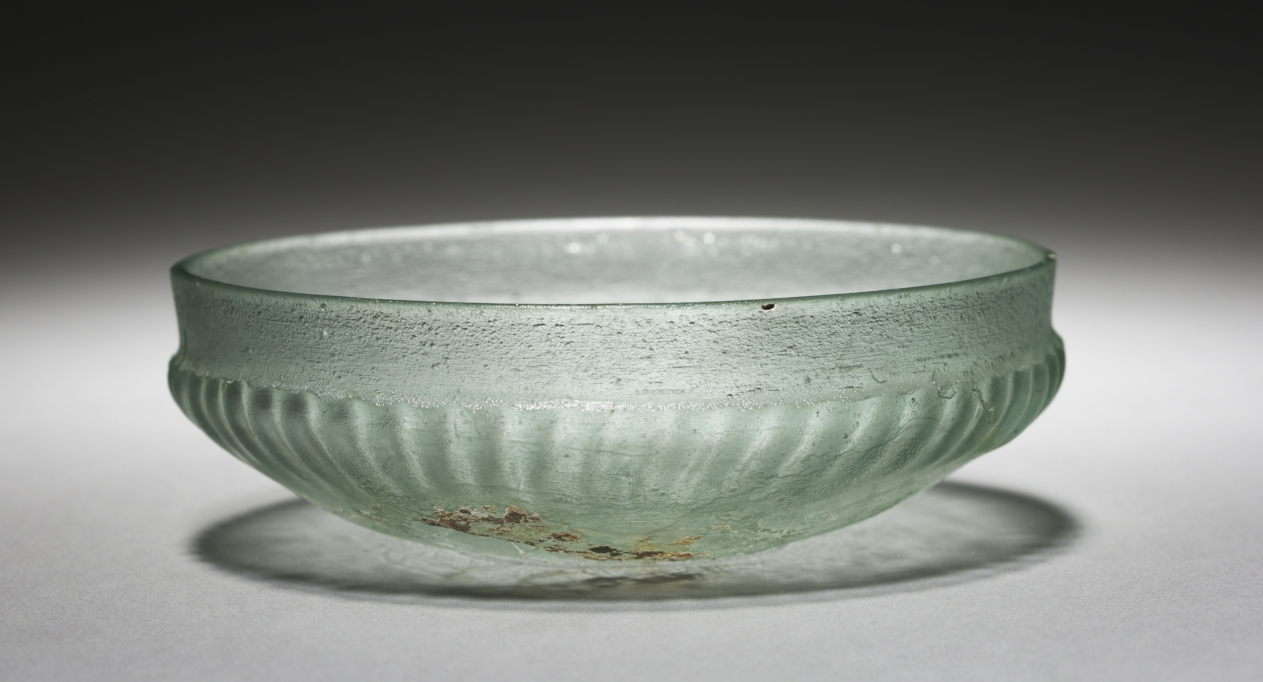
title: Shallow Ribbed Bowl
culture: Roman, Eastern Mediterranean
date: 50 BCE–100 CE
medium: glass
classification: Glass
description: Shallow ribbed glass bowls, often light blue, green, or turquoise in color, are a fairly common ancient glass vessel type. They were likely made by blowing or pressing molten glass into molds, sometimes leaving visible air bubbles within the glass matrix. After cooling, an artisan would rotate the bowl on a wheel or lathe, using a gentle abrasive to smooth out imperfections.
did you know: Shallow ribbed bowls could have multiple uses: eating, drinking, libations, and more.